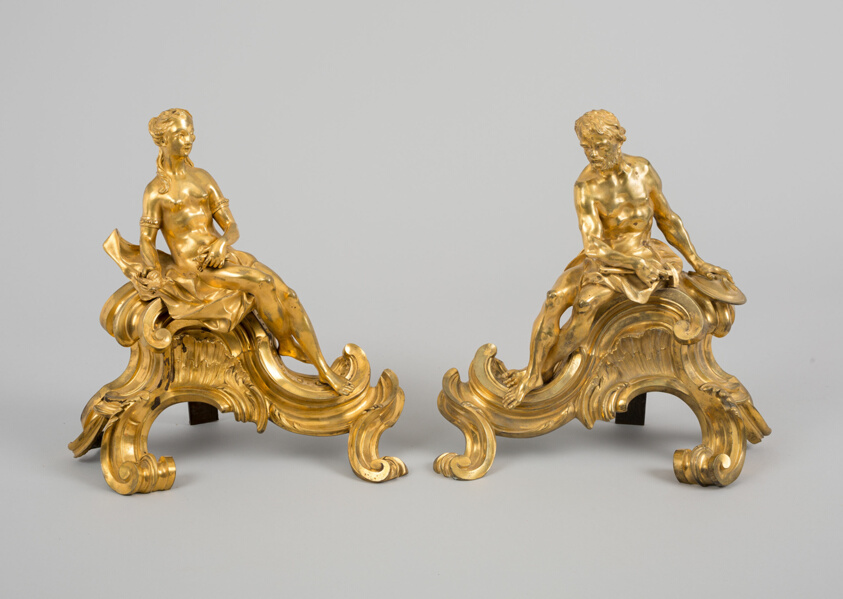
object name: Metalwork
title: Firedog: Vulcan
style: louis xv, european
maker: France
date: Mid 18th century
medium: Gilt bronze, iron supports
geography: France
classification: fireplace equipment; european decorative arts; metalwork